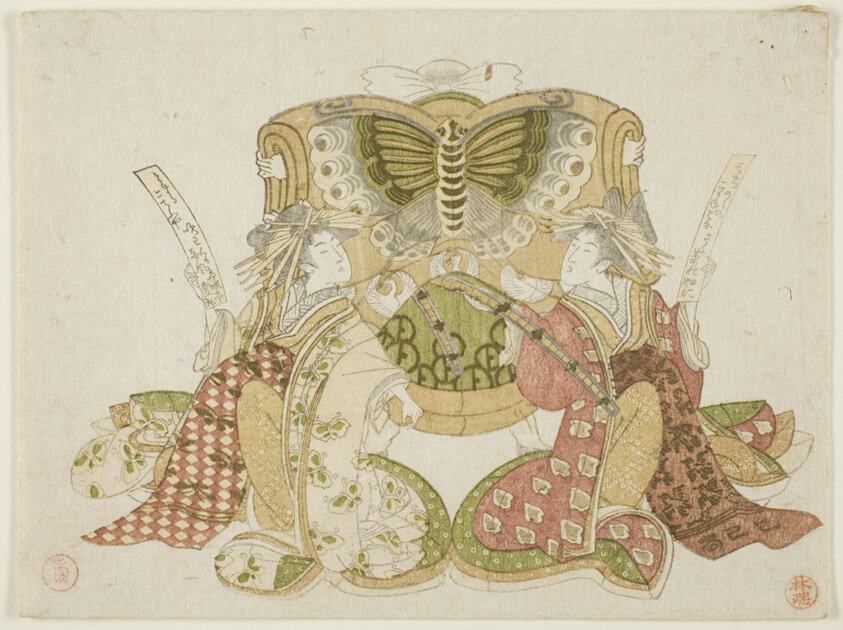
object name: Print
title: Soga no Goro, Oiso no Tora, and Kewaizaka no Shosho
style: Japanese (culture or style)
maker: Kubo Shunman (Japanese, 1757–1820)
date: 1809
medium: Color woodblock print; surimono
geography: Japan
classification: woodblock print; print; asian art